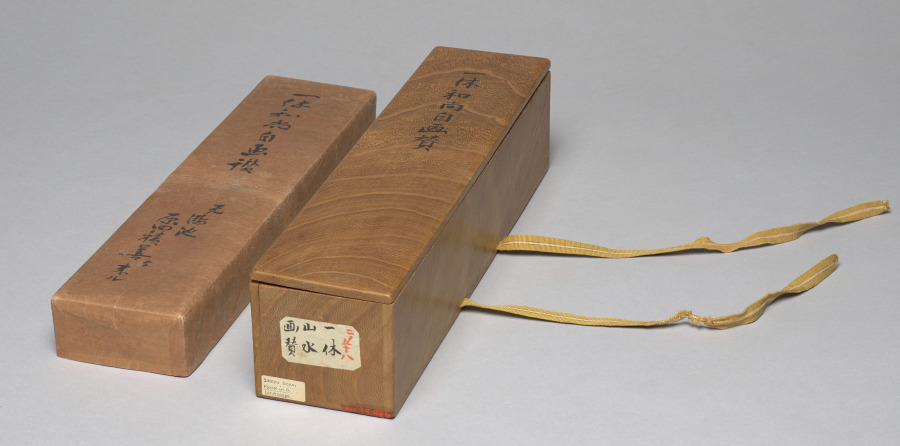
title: Listening to the Wind in the Pines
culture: Japan, Muromachi period (1392–1573)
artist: Ikkyū Sōjun (Japanese, 1394–1481)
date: 1400s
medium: hanging scroll; ink on paper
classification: Painting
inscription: 山居僧聴松風/何須臨済徳山禅一箇住山/三十年公案工夫了畢後/長松風静罷参眠 (transcribed by Trevor Menders with Zheng Xiaoying 2017, revised by Osvaldo Mercuri 2021)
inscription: 紫野龍寶門客东海純一休老和尚畫と詩一筆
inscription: 落款 一休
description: A monk sits in contemplation below an overhang covered with pine. The poem, titled "Monk in the Mountains Listening to the Wind in the Pines," refers to two Chinese Chan (Zen) Buddhist monks active in the ninth century. It may be translated as follows: Why must the Zen of Rinzai (Linji Yixuan) and Tokusan (Deshan Xuanjian) reside in a single temple for thirty years? Once he's solved his kōan, (the monk) ends his practice and falls asleep in the quietness of the wind among the tall pines. (translated by Osvaldo Mercuri) According to an inscription following the poem, both painting and verse were done by an eminent Japanese Buddhist monk known for revitalizing the Kyoto temple Daitokuji.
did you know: The word mountain, appearing in the title to the poem on this painting, can also refer to a temple.